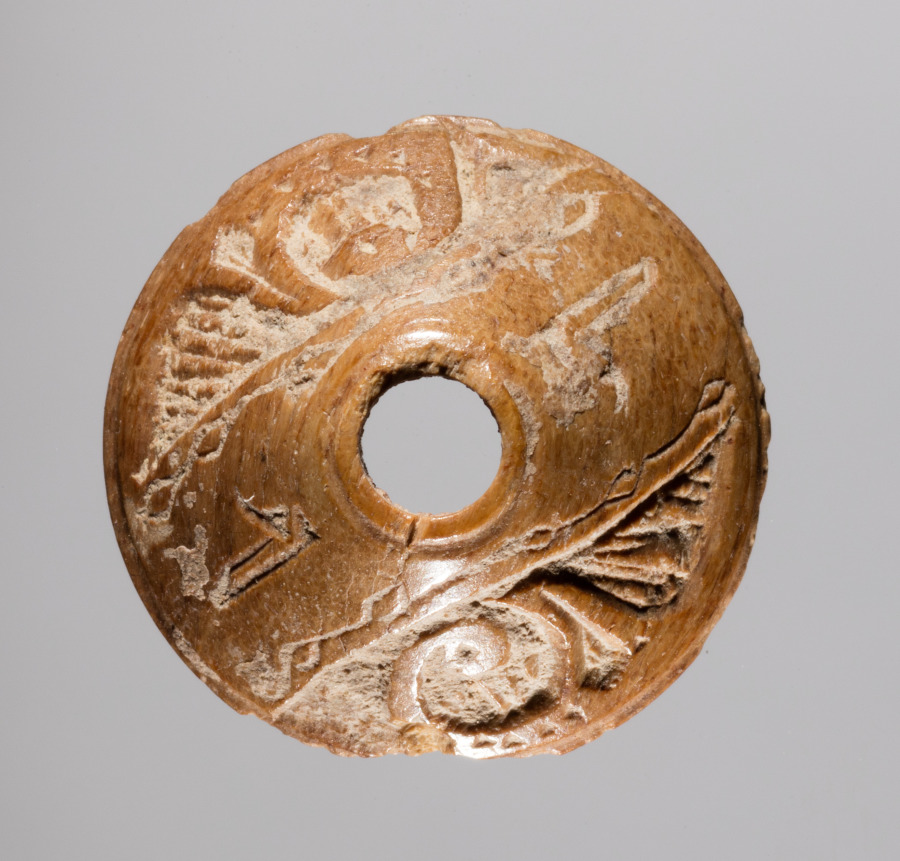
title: Spindle Whorl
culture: Iran, early Islamic period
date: 700s - 900s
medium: bone, incised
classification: Spindle Whorl